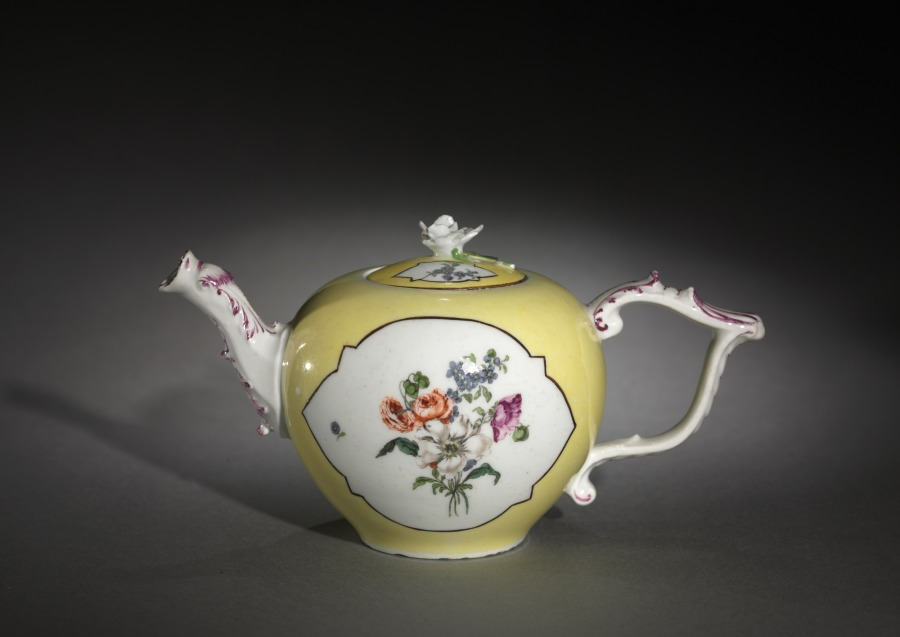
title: Teapot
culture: Germany, Meissen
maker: Meissen Porcelain Factory (German, est. c. 1710)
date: c. 1750–70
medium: porcelain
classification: Ceramic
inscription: Mark on the bottom that looks like two swords crossing, with a small V intersecting.